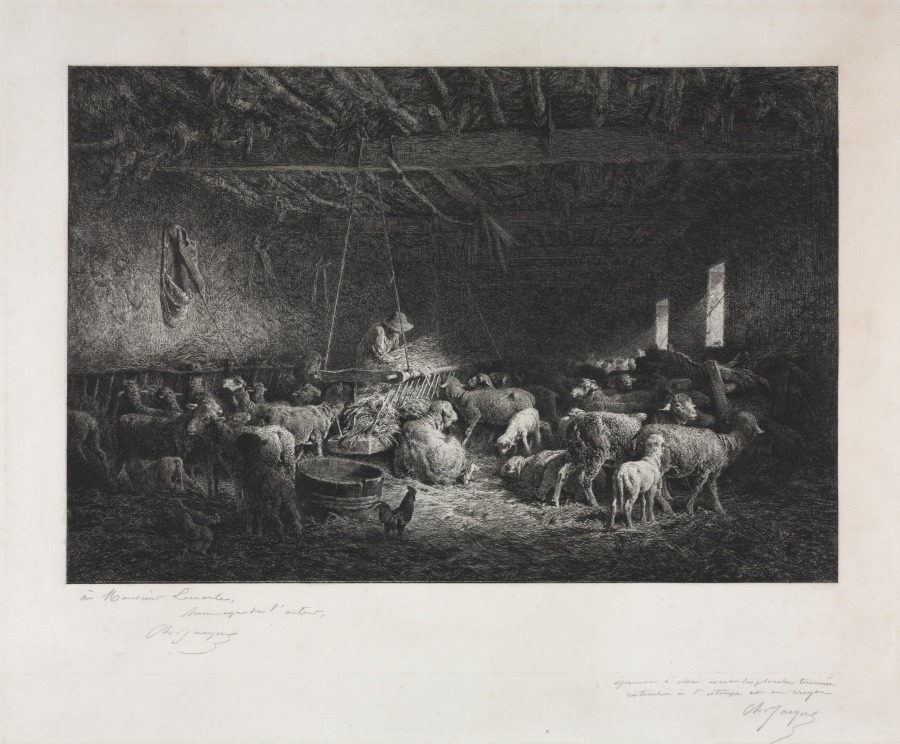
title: Stable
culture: France, 19th century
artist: Charles-Émile Jacque (French, 1813–1894)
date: 1859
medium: etching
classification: Print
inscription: Below bottom left corner of image, in pencil: "à Monsieur Lamerle [?], ---[?]--- de l'artist. Ch. Jacque" Near bottom right corner of sheet, in pencil: "---[?]--- d'essai avant la planche terminée. retouchée à l'estampe et au crayon. Ch. Jacque"